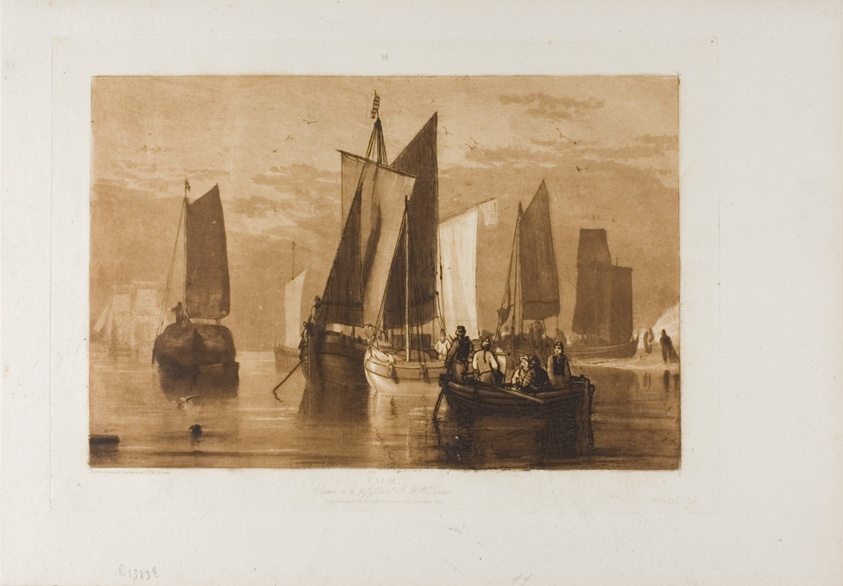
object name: Print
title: Calm, plate 44 from Liber Studiorum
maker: Joseph Mallord William Turner (English, 1775-1851)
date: published April 23, 1812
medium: Etching and engraving in brown on ivory laid paper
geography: England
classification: etching; print; prints and drawing